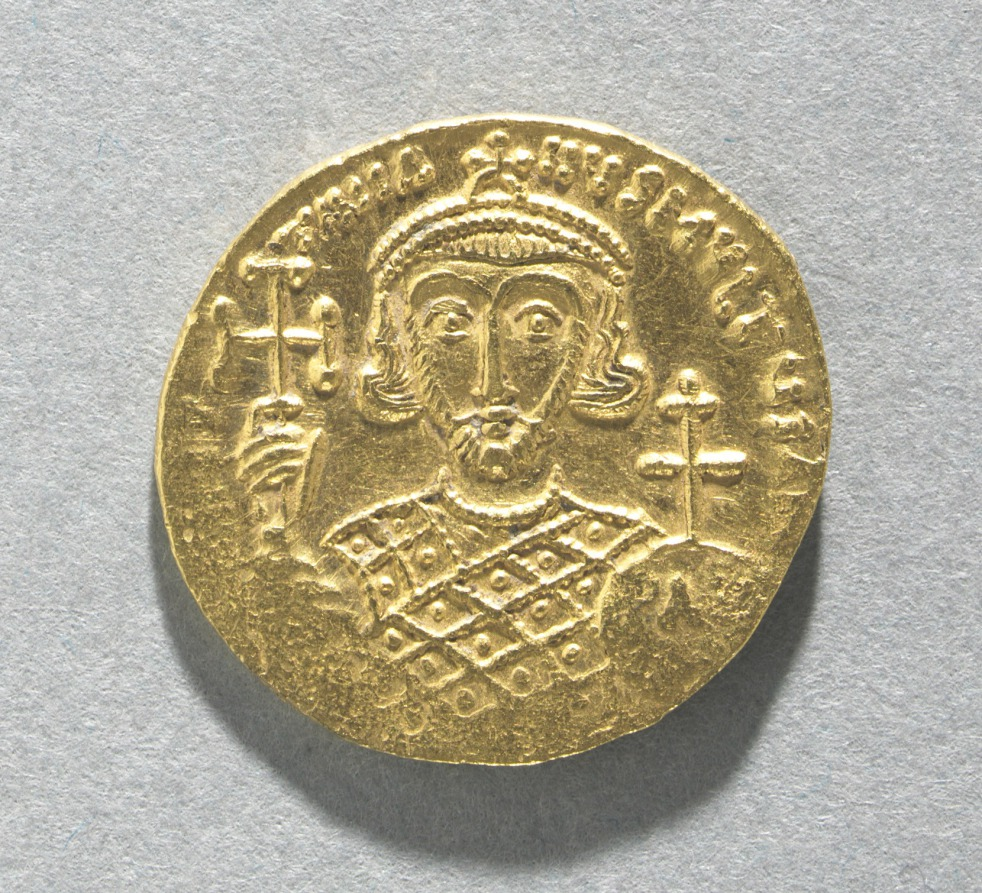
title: Solidus with Bust of Justinian II (reverse)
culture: Byzantium, Constantinople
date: 705 AD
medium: gold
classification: Coins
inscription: Obverse: Bust of Christ, facing, with mustache, close beard, and curly hair; wearing pallium over colobium, his right hand is raised in benediction; his left holds the book of gospels. Behind his head is a cross. Inscription: dN IhS ChS REX REGNANTIUM Reverse: Bust of Justinian II, with mustache and close beard, wearing loros and crown with cross on circlet. In right hand he holds a cross potent on base with three steps, in his left hand he holds a patriarchal cross on globe inscribed with the letters PAX Inscription: DN IUSTINIANUS MULTUS AN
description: The vast number of surviving Byzantine coins attests to the level of trade across the empire. Controlled and supervised by the emperor, the producers of coins took care to represent his authority and reflect his stature. Talented artists were recruited to engrave the dies (molds) used for the striking of coins. Emperors increasingly came to include their heirs and co-emperors on their coinage, as well as other family members or even earlier rulers. Coins were recognized, then as now, as small, portable works of art. With their inscriptions and images, Byzantine coins provide valuable documentation of historical events and a record of the physical appearance of the emperors. The solidus is a basic gold coin of 24 karats. A tremissis is a gold coin of one-third the weight and value of the solidus. The nomisma in the 10th century replaced the solidus as the standard gold coin.